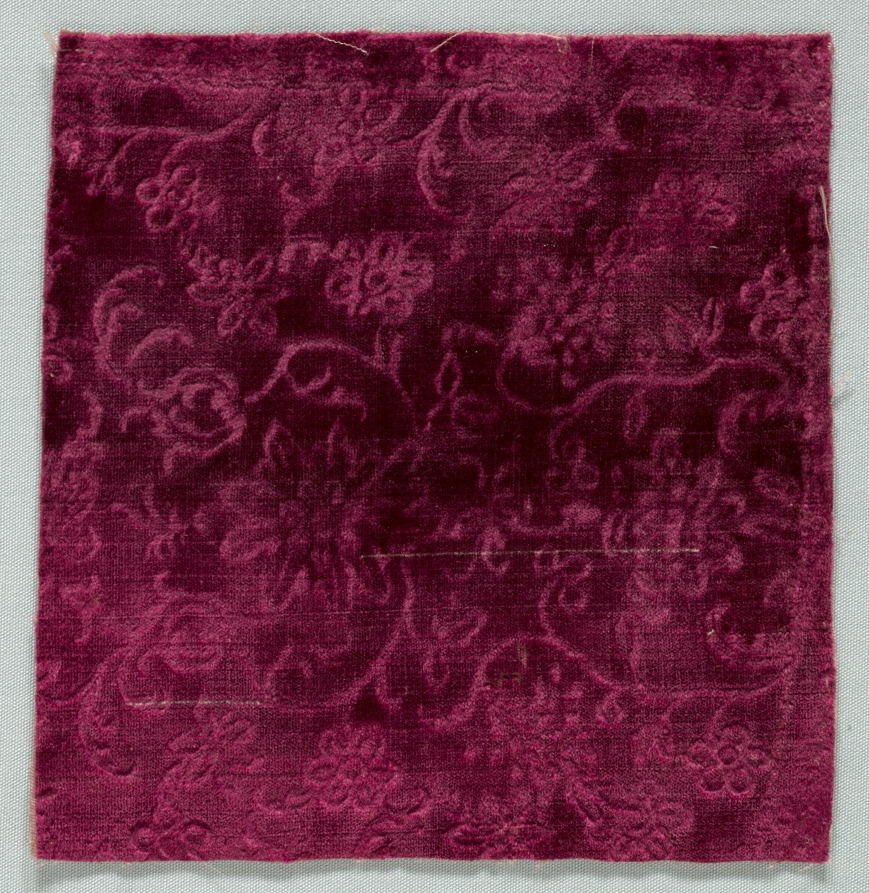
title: Velvet Fragment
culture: Italy, late 17th century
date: late 1600s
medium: velvet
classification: Velvet